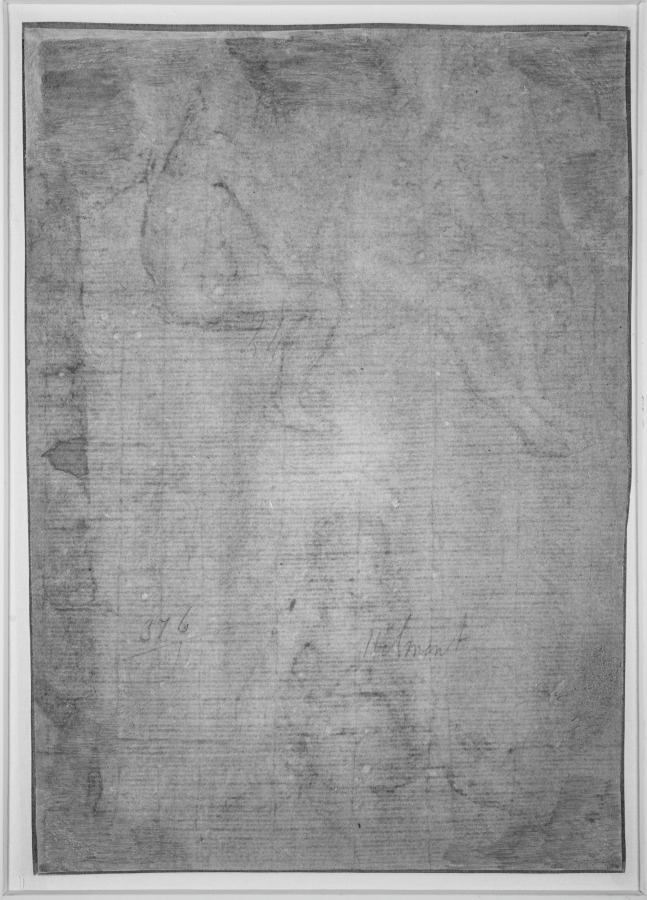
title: Studies of a Naked Seated Boy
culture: Netherlands, 16th - 17th century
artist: Jacob de Gheyn II (Netherlandish, 1565–1629)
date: c. 1603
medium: Black chalk and white chalks with stumping on gray-blue antique laid paper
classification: Drawing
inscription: in graphite, verso: “24” and “376/” and “Helmont”?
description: This sheet of studies of a young male model drawn from various angles is among the earliest nudes drawn from life in the Netherlands. The artist Jacques de Gheyn carefully observed the boy’s body and poses, concentrating on the modeling of his skin and muscles through light and shadow rendered with a combination of black and white chalks on gray-blue paper. The directness of this study was unusual in the Northern Netherlands around 1600, where the vogue for mythological scenes inspired human bodies that were more artificial than natural.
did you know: This sheet of studies of a young male model drawn from various angles is among the earliest nudes drawn from life in the Netherlands.